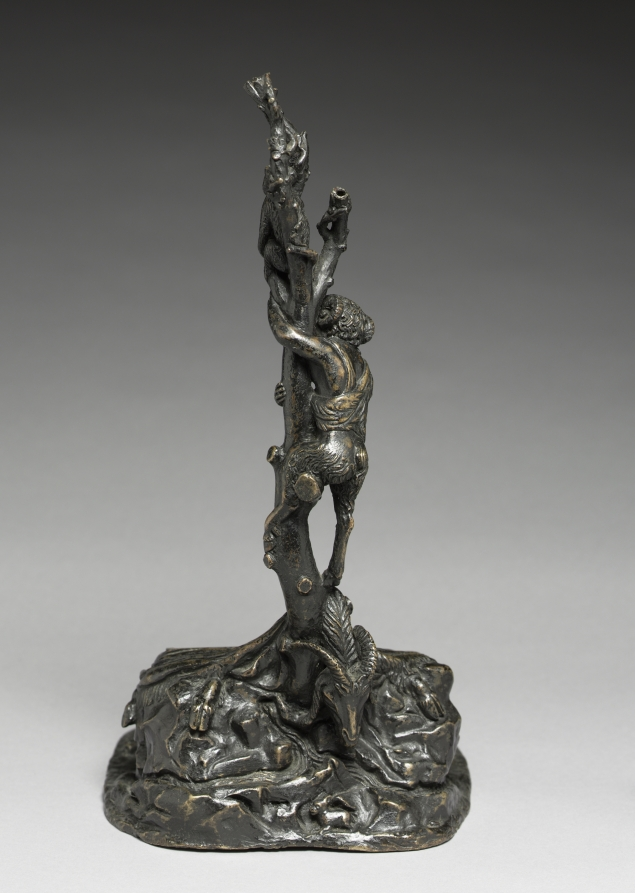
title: Base for a Satyr and Satyress Group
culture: Italy, possibly Padua, early 16th century or later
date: early 1500s or later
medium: bronze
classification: Sculpture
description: The pagan subject matter here was common in the 1500s and, with the pan pipes on the ground, indicates a scene of poetry and music. Long thought to be an ink stand, the two openings are now understood as possibly having housed a satyr and satyress.